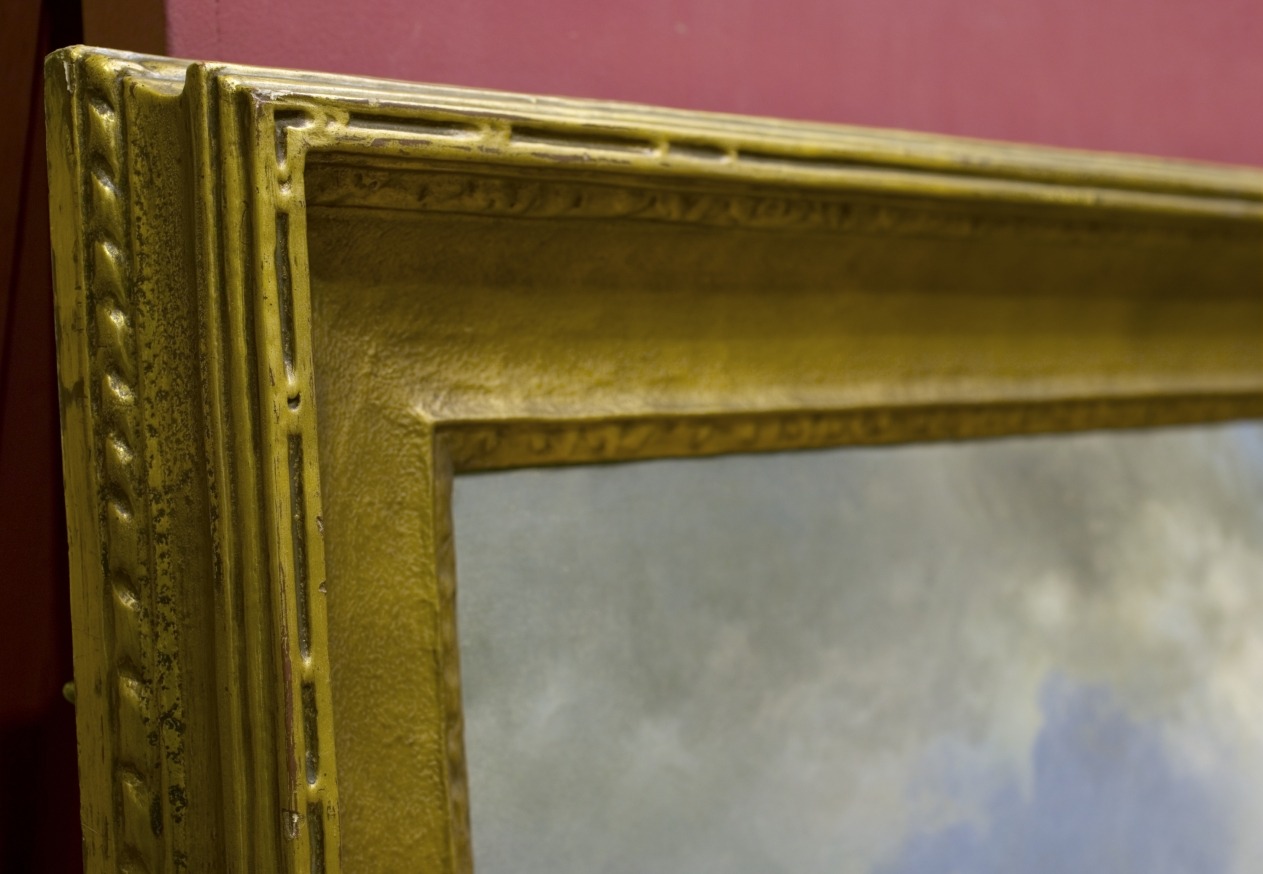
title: Mount Starr King, Yosemite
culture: America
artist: Albert Bierstadt (American, born Prussia [now Germany], 1830–1902)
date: 1866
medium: oil on canvas on panel-back stretcher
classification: Painting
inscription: signed lower right: ABierstadt. / 66 [AB in monogram]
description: During the summer of 1863, Bierstadt visited Yosemite Valley in California and made numerous sketches. Back in his New York studio, he used them to produce many majestic paintings, including this view of the distant granite peak Mount Starr King. Such scenes thrilled East Coast audiences and helped encourage early movements to safeguard natural wonders. In 1864, President Lincoln signed a bill preserving Yosemite as public property; it became a national park in 1890. Bierstadt included two Native Americans with a packhorse in his composition, and their presence references the fact that Indigenous peoples had inhabited or seasonally visited the region for millennia. Over time, various government and military agencies dispossessed them of these ancestral lands. Although no longer residents in the national park, descendants of the seven Indigenous nations with ties to Yosemite persevered to live in neighboring areas.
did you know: Highly successful, Bierstadt built a mansion and named it Malkasten, a German word meaning “paintbox.”